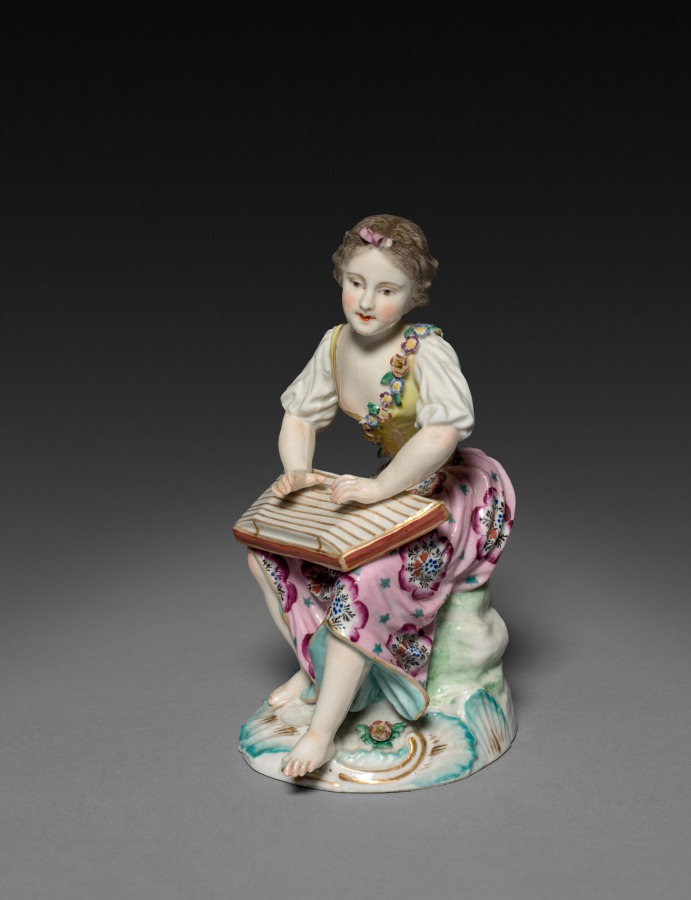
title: Girl Musician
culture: Germany, 18th century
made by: Frankenthal Porcelain Factory (German)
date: c. 1770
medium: porcelain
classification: Ceramic